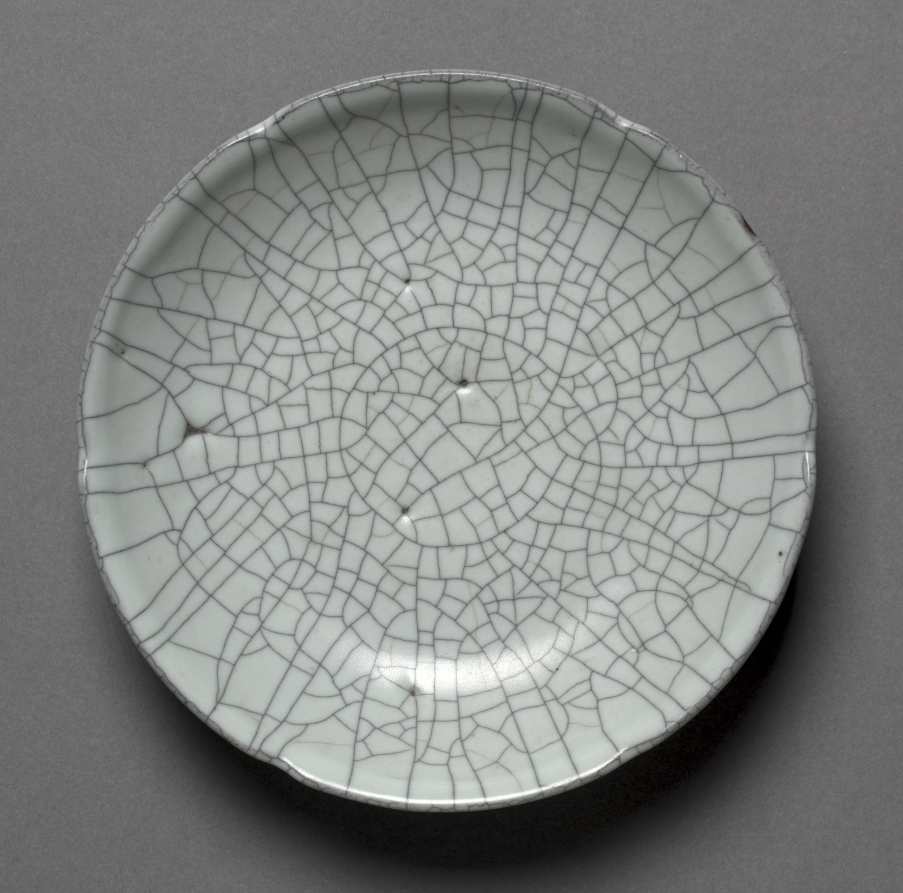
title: Flat Dish: Guan ware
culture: China, Song dynasty (960-1279)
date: 960–1279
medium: glazed reddish-brown stoneware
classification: Ceramic